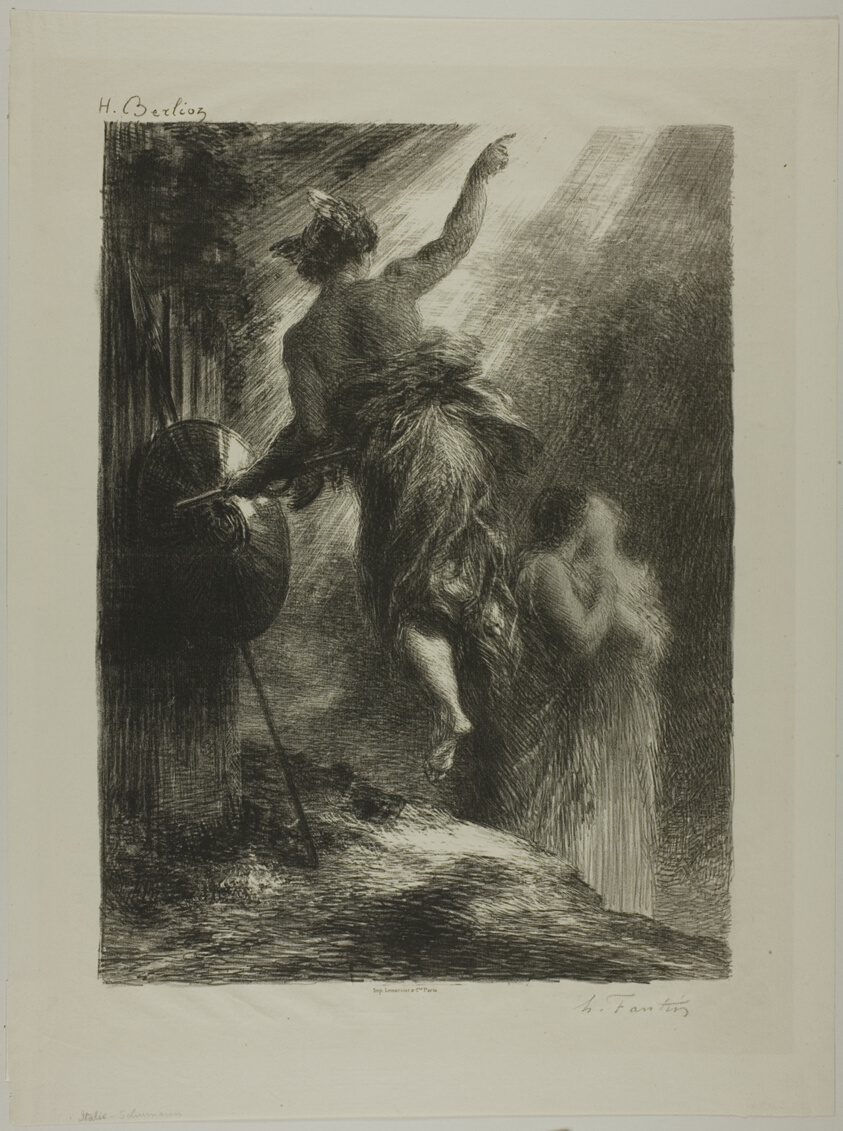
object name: Print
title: Italy!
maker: Henri Fantin-Latour (French, 1836-1904)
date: 1884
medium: Lithograph in black on ivory laid paper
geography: France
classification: lithograph; print; prints and drawing